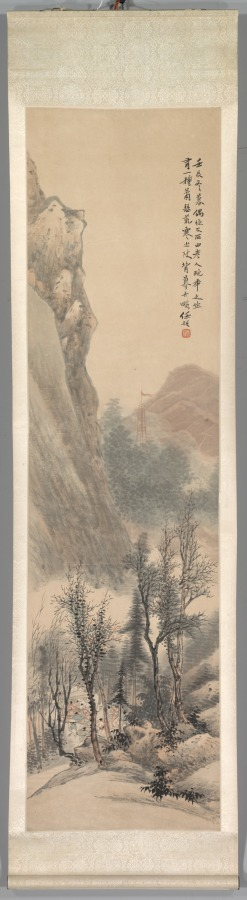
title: Landscape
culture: China, Qing dynasty (1644-1911)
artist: Ren Yu (Chinese, 1853–1901)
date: 1892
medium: Hanging scroll; color on paper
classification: Painting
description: This seasonal landscape is from a set of four hanging scrolls by Ren Yu. He was the youngest, most eccentric, and least prolific of the Four Rens, a family of prominent painters in Shanghai during the late Qing dynasty (1644–1911). Perhaps due to his opium habit and subsequent financial difficulties, Ren Yu tended to be lackadaisical in his work. The few remaining high-quality paintings hint at his artistic potential lost to opium. Though Ren’s premature death left his artistic promise unfulfilled, his paintings were acquired and donated to the museum by Charles Lang Freer (1854–1919), a wealthy businessman and art collector from Detroit. As Freer had hoped, this donation of Ren Yu paintings inspired the young Cleveland Museum of Art to continue to expand its own Chinese painting collection.